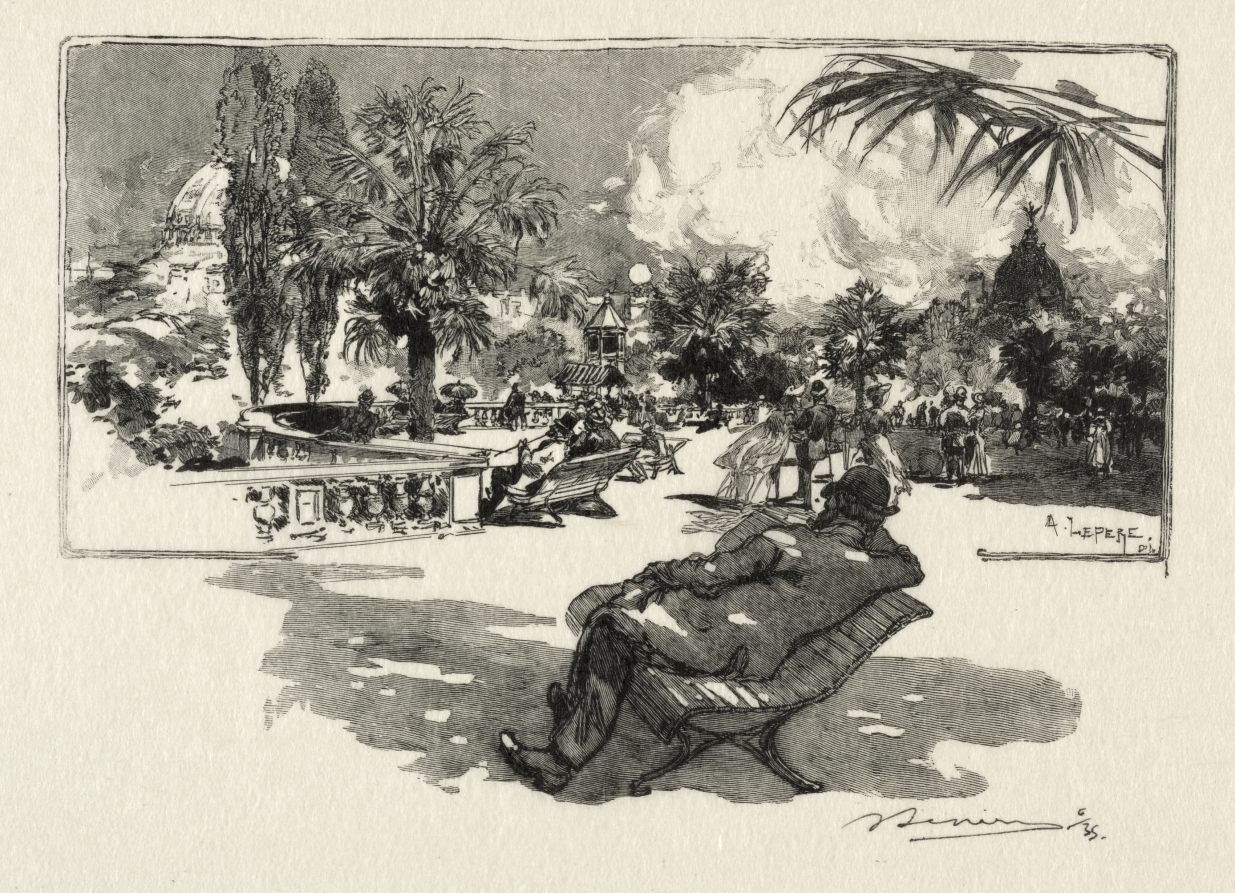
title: La Terrasse des Arts Libéraux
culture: France, 19th-20th century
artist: Auguste Louis Lepère (French, 1849–1918)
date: 1889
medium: wood engraving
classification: Print